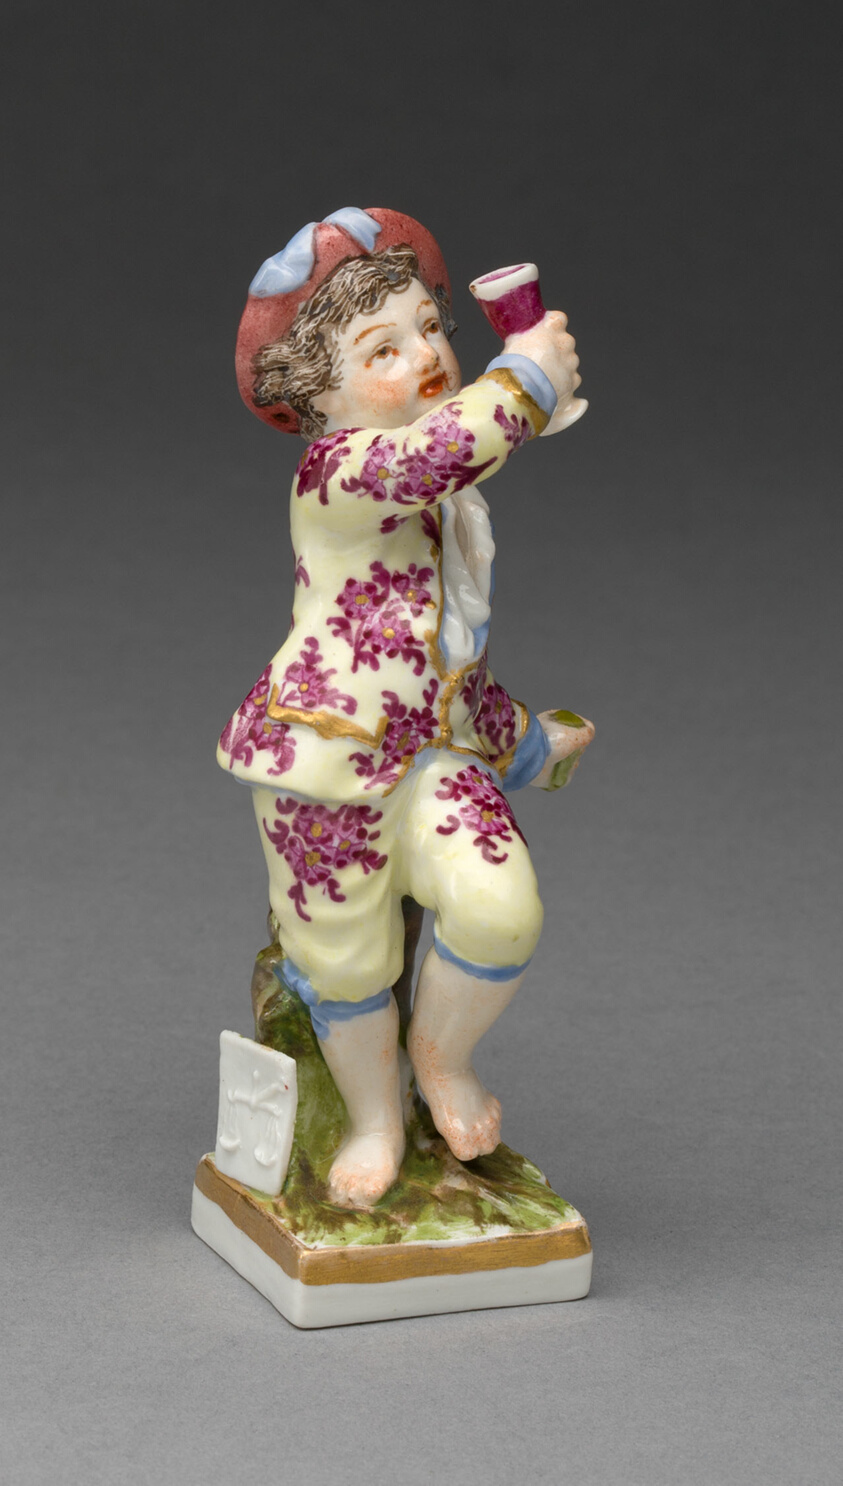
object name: Ceramics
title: October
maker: Germany, Berlin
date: c. 1770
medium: Hard-paste porcelain, polychrome enamels, and gilding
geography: Berlin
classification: sculpture; ceramics; porcelain; european decorative arts